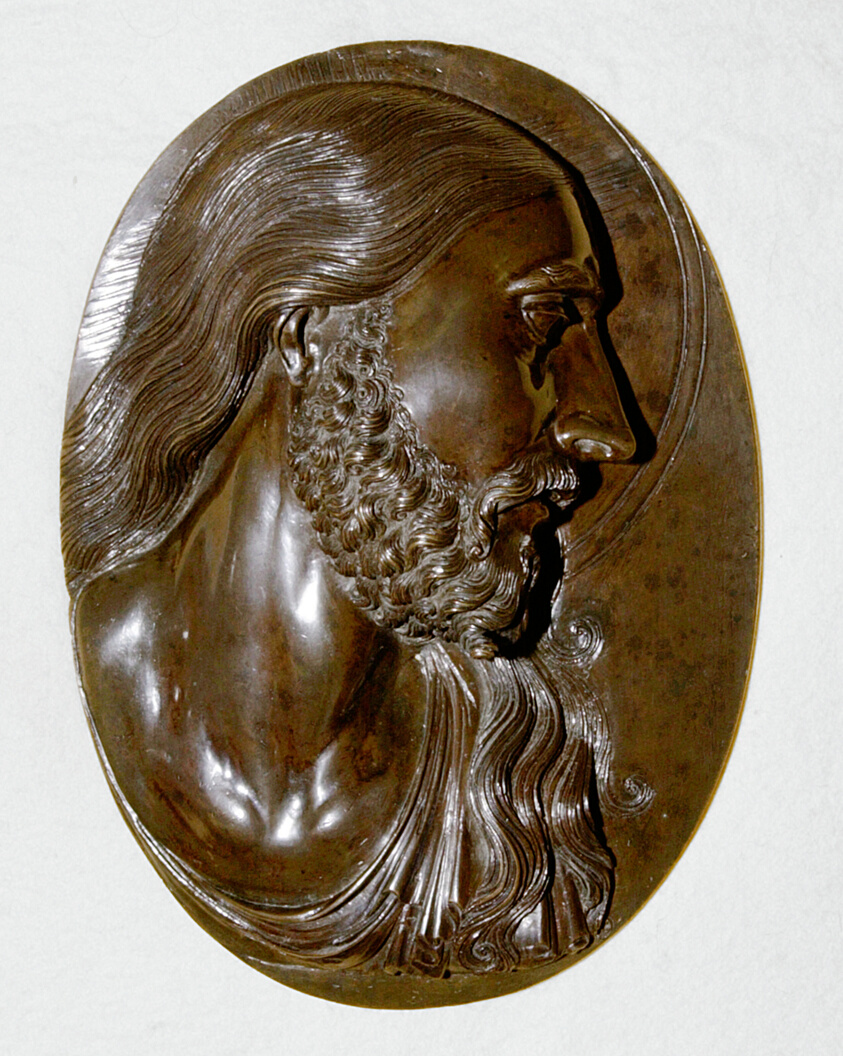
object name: Sculpture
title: Head of Christ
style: 17th Century, 18th Century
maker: French or Italian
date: c. 1600/1700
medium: Bronze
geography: France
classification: relief; sculpture; bronze; french; Italian; metal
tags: busts, Devotion, Christianity, Christian subjects, head, man, religious figures, religious, religion, Jesus